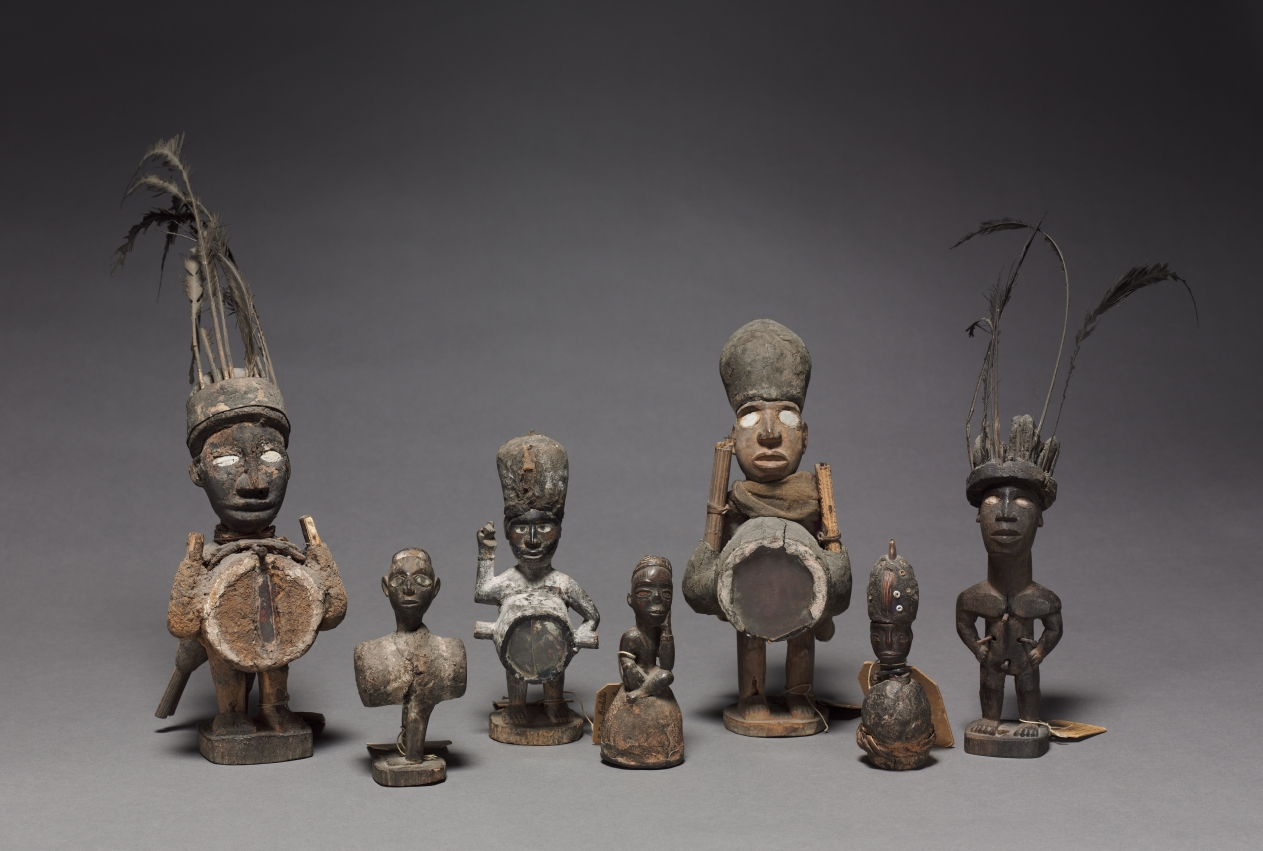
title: Power figure (nkisi)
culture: Central Africa, Republic of the Congo, Kongo people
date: late 1800s-early 1900s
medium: Wood, organic materials (including resin), iron, reed, tooth, seashell or glass beads, and possibly plastic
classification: Sculpture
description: One of seven anthropomorphic figurines, these minkisi contained medicines in which an ancestral spirit was believed to reside. Minkisi were objects of communal use; if conflict arose between two citizens, the Nkisi figure, along with the nganga (ritual leader) helped resolve the dispute. This small figure belonged to “the sorcerer of Loango,” chief of all sorcerers of that region (a province and port in West Central Africa).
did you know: This small figure belonged to “the sorcerer of Loango,” chief of all sorcerers of that region (a province and port in West Central Africa).